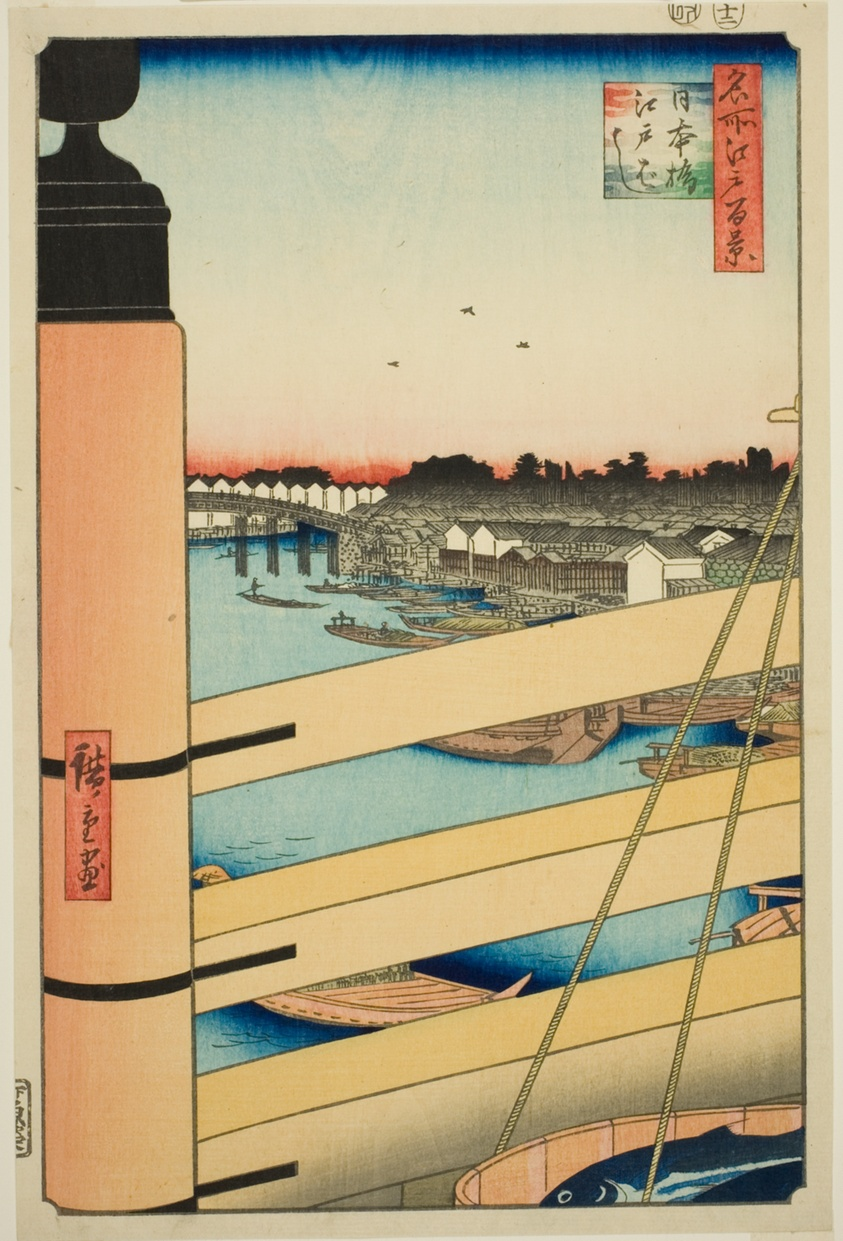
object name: Print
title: Nihon Bridge and Edo Bridge (Nihonbashi, Edobashi), from the series "One Hundred Famous Views of Edo (Meisho Edo hyakkei)"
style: Japanese (culture or style)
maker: Utagawa Hiroshige 歌川 広重; Japanese, 1797-1858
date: 1857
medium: Color woodblock print; oban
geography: Japan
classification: woodblock print; print; asian art